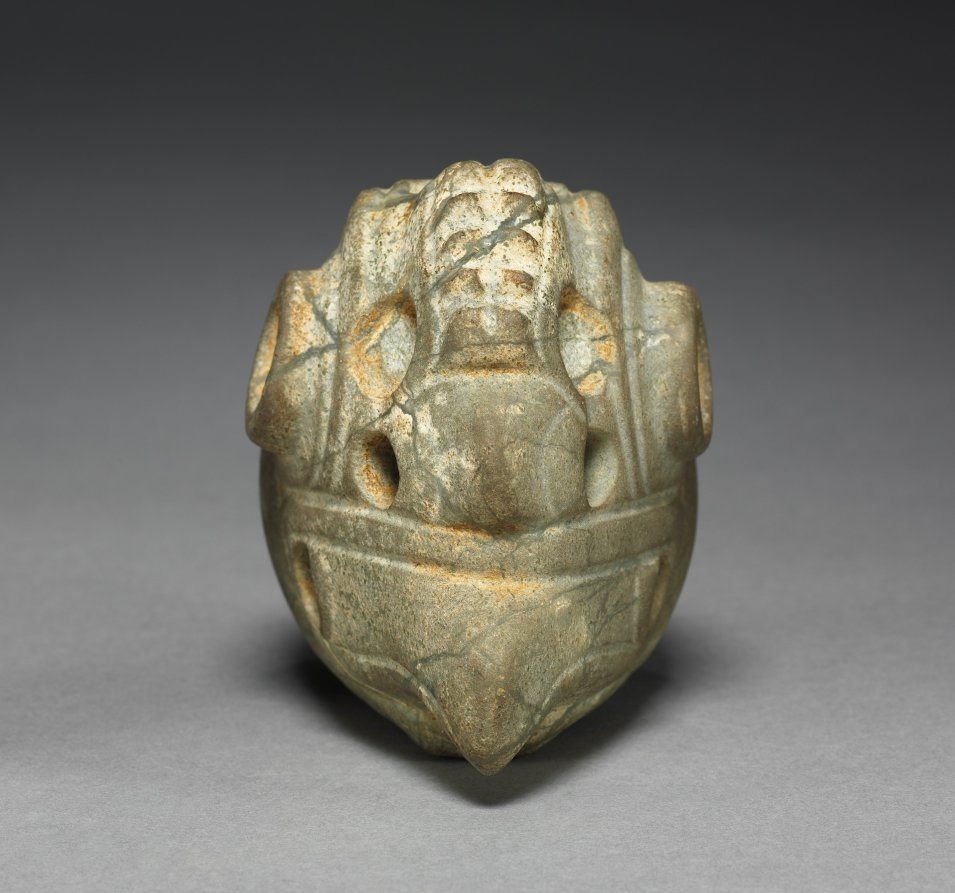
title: Ceremonial Mace (Club) Head: Bird (Male Curassow?)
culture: Costa Rica, Southern Nicoya region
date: 300 BCE–600 CE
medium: stone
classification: Sculpture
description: Probably once mounted on wooden shafts, these objects could have served as symbols of chiefly authority, group insignia, the heads of ceremonial weapons, or all three. They eventually were placed in elite graves. The bird may be a male curassow and the feline, a jaguar.